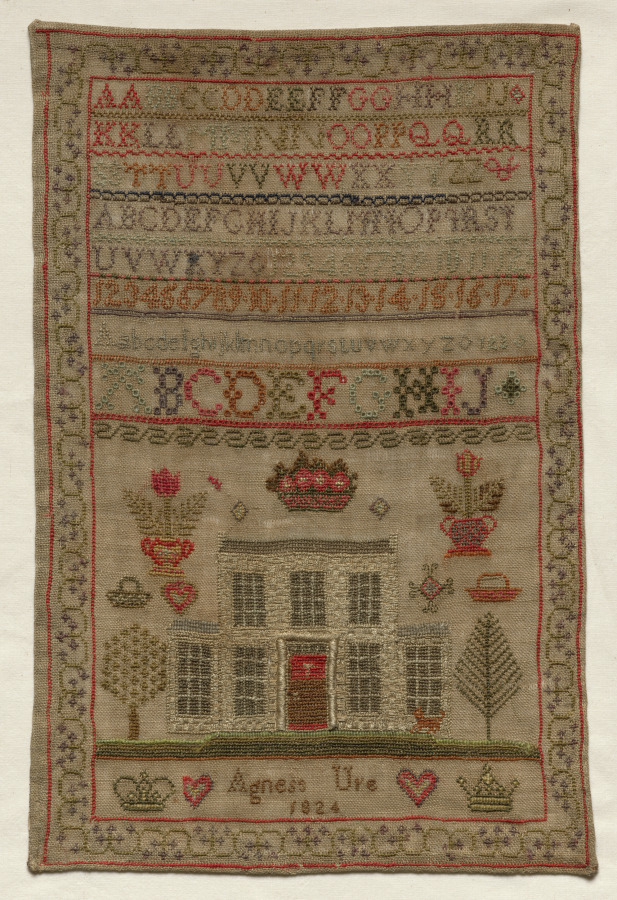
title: Sampler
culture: England, early 19th century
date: 1824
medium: embroidery; silk and wool on linen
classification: Sampler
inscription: above: "AABBCCDDEEFFGGHHIIJJ/ KKLLMMNNOOPPQQRR/ SSTTUUVVWWXXYYZZ/ ABCDEFGHIJKLMNOPQRST/ UVWXYZ/123456789.101112.13.14.15.16.17*/ Aabcdefghijklmnopqrstuvwxyz/ ABCDEFGHIJ"; below: "Agness Ure/ 1824."